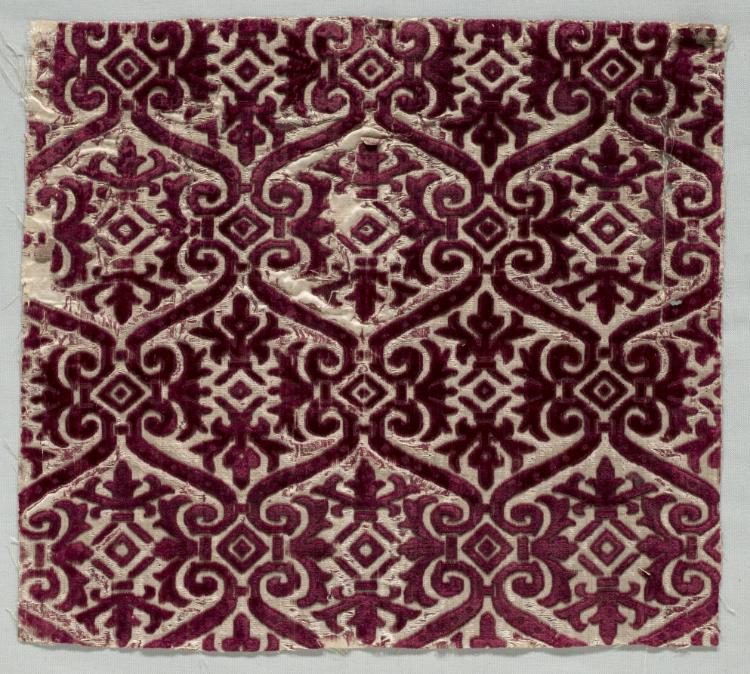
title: Velvet Brocaded Textile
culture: Italy, late 16th century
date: late 1500s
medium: velvet (brocaded)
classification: Velvet